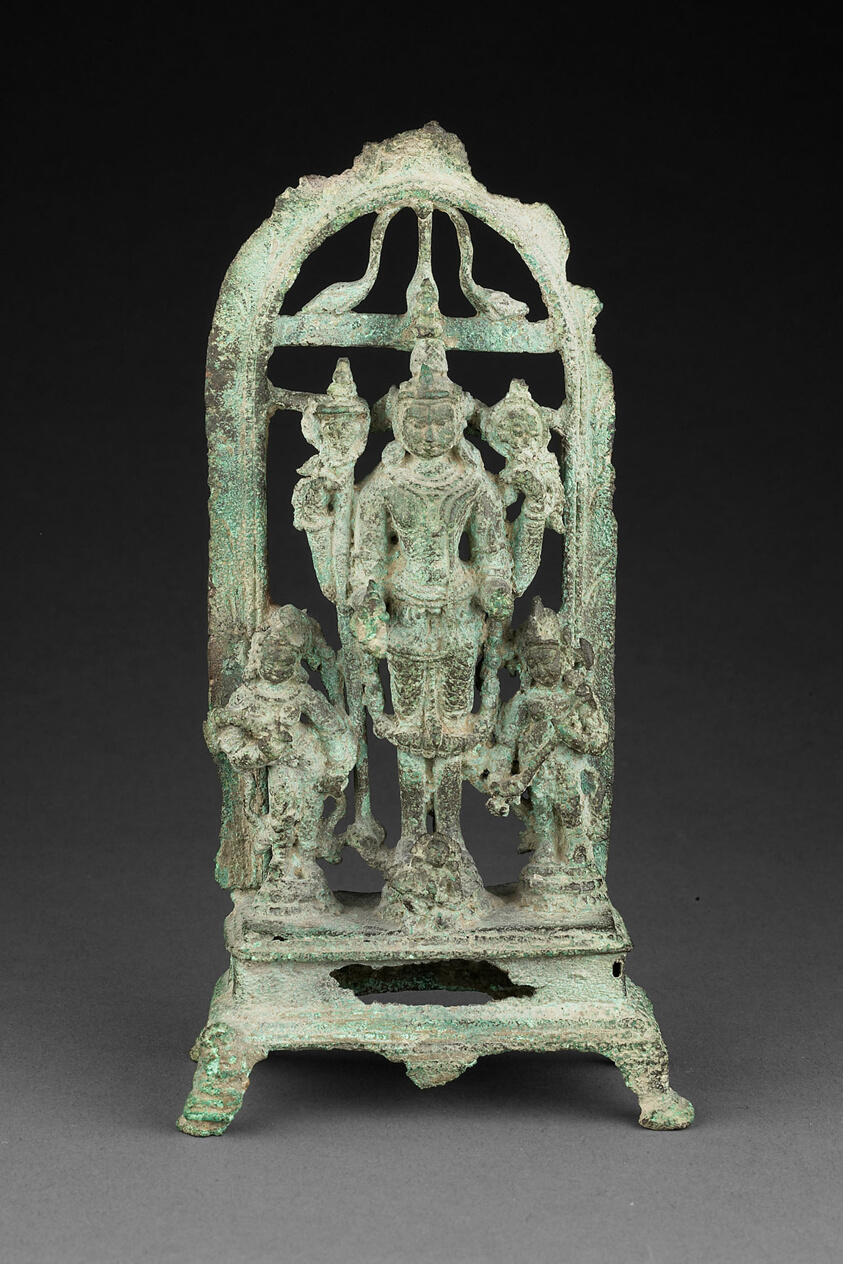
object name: Sculpture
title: God Vishnu with Lakshmi and Sarasvati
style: South Asian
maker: India; Bengal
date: Pala period, 10th/11th century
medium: Bronze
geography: Bengal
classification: bronze; metal; sculpture; asian art